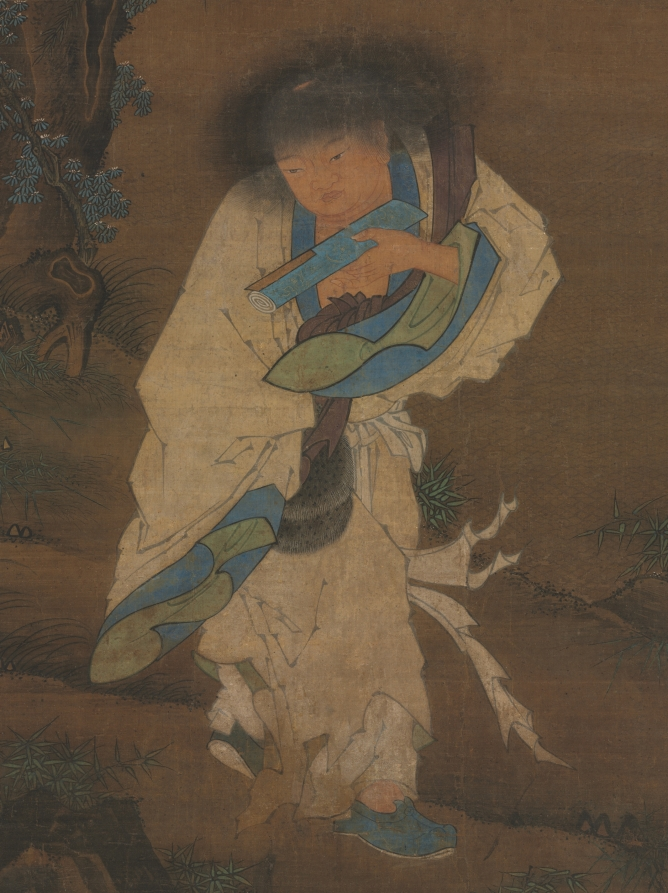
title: Poet and Recluse Hanshan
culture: China, Ming dynasty (1368–1644)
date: 1400s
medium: hanging scroll; ink and color on silk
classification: Painting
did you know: Hanshan, a Tang poet of vernacular verses, is often associated with Chan Buddhism and is considered a deity in disguise.